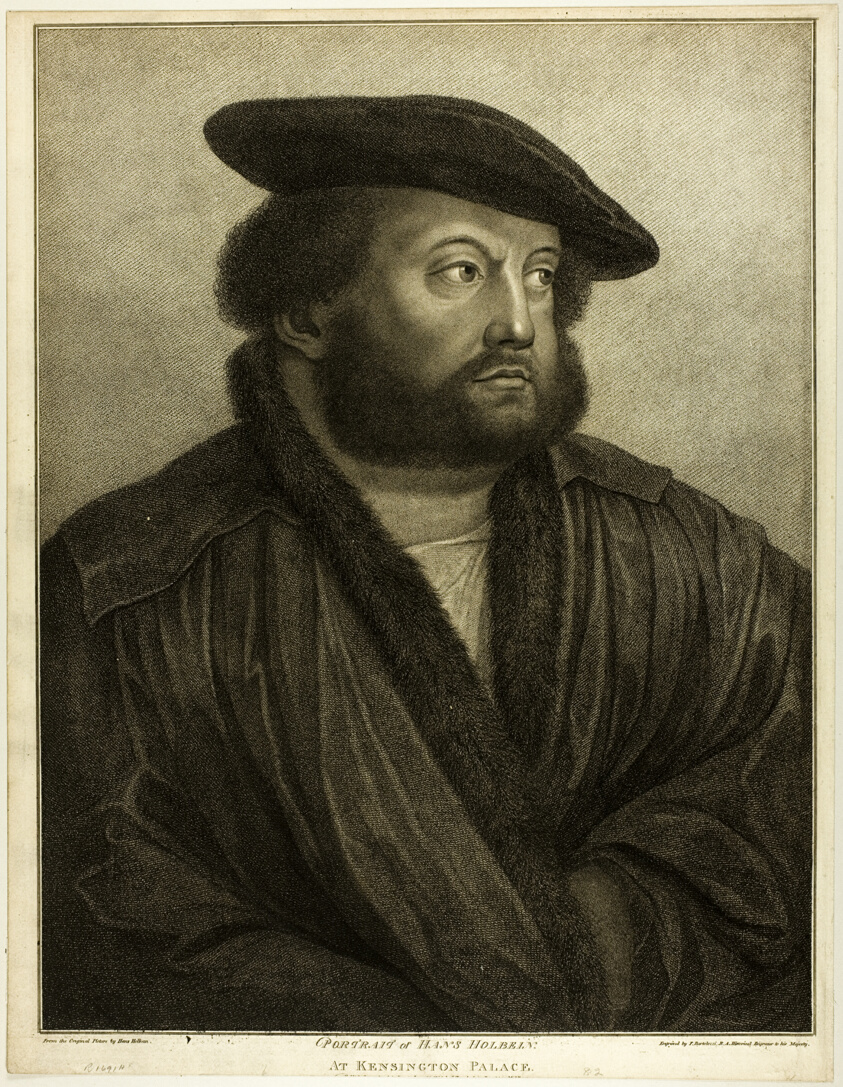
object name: Print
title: Hans Holbein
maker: Francesco Bartolozzi (Italian, 1727-1815); after Hans Holbein the younger (German, 1497-1543)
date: published June 25, 1798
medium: Stipple engraving on cream wove paper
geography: Italy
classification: engraving; print; prints and drawing